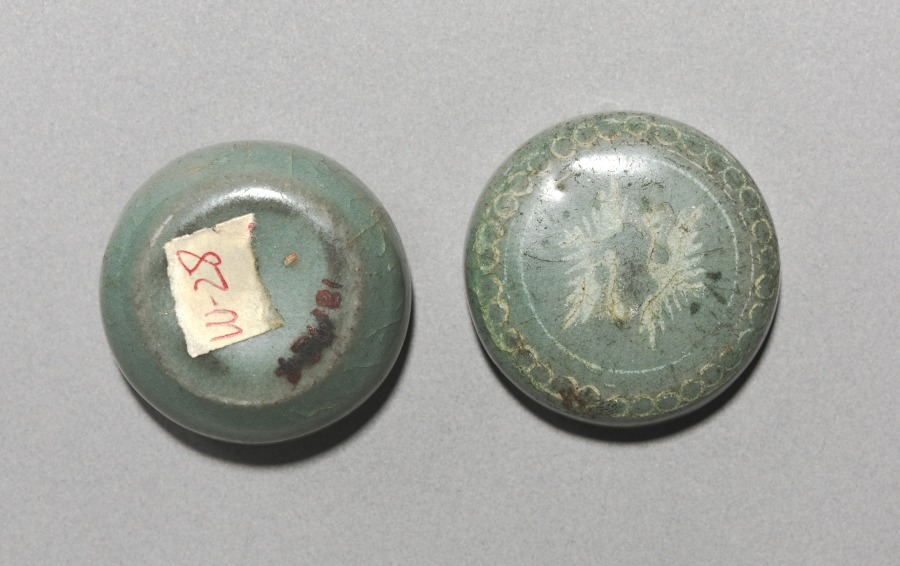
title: Box and Cover with Inlaid Crane Design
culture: Korea, Goryeo dynasty (918–1392)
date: 1200s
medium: celadon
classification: Ceramic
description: Celadons, spoons, seals, and bronze mirrors were the most common burial objects in tombs during the Goryeo period (918-1392). Once used to contain color powder, rouge and eyebrow gel for makeup, this small container was one of the standard goods that furnished elites' tombs. Goryeo-period women and men used the grain powder of rice or millet for whitening their skin, safflower extract for rouge, and plant ash or soot for eyebrow gel. Yet, natural-looking make-up seems to have been the most favorable one in Korea according to the travelogue by Xu Jing (1091-1153), the Chinese diplomat who visited Korea in 1123.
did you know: This ceramic container was used to store either incense or cosmetics.